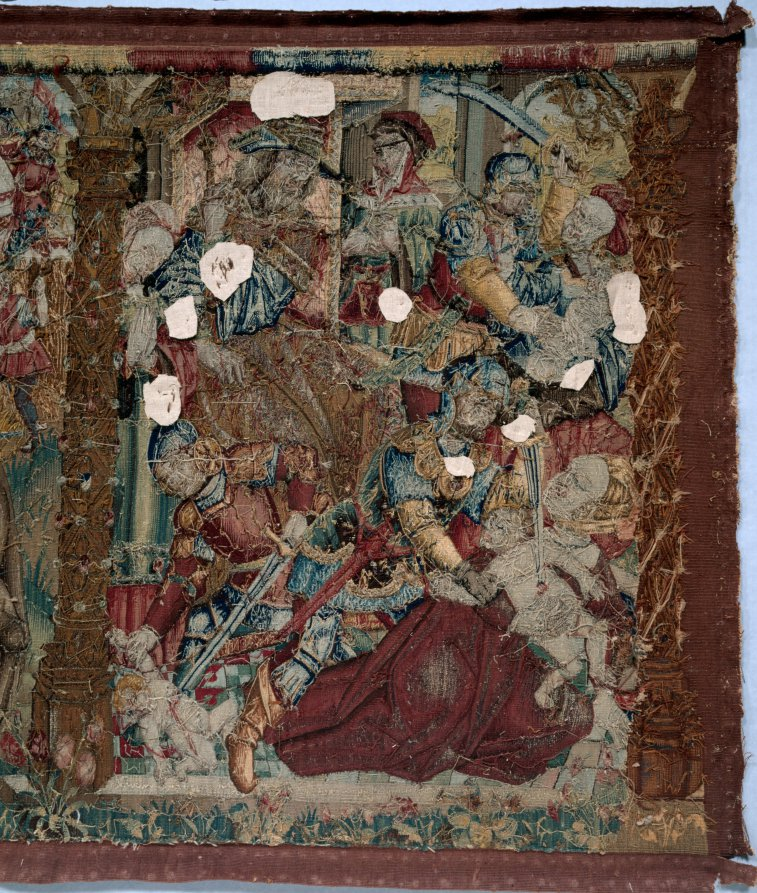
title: Altar Frontal: Scenes from the Childhood of Christ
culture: France and South Netherlands, 1500s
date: c. 1500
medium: Wool, silk, gold thread; tapestry weave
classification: Tapestry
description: Pictorial tapestries were symbols of wealth and more highly prized than paintings. Small tapestries with Christian imagery were frequently commissioned to embellish the fronts of altars. This example displays the Massacre of the Innocents, the Flight into Egypt, and Christ among the Doctors. Tapestry weave is ideal for creating narrative scenes. The technique can be compared to painting, as each colored weft (horizontal thread) is interlaced with warps (vertical thread) where needed for the pattern. As expensive investments, tapestries have the advantage of being portable and easily stored and displayed.